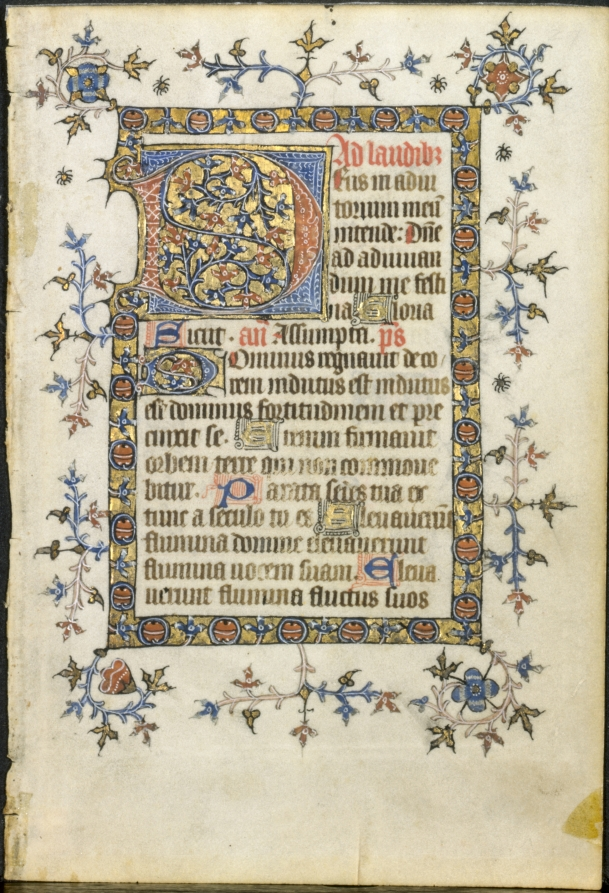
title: Leaf from a Book of Hours: Initial D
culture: England, early 15th century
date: c. 1400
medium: ink, tempera and gold on vellum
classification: Manuscript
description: Not all books of hours were decorated with conventional historiated initials or full-page miniatures containing figural scenes. The illuminator of this leaf incorporated a more subtle decorative scheme consisting of a large, flower-filled initial D for Deus that gives a focus to the page. A rectangular bar border with ivy leaf sprays punctuated with flowers in the corners flows from this initial. The layout is neat, yet elegant. The palette of orange-reds and pale blues is typically English.